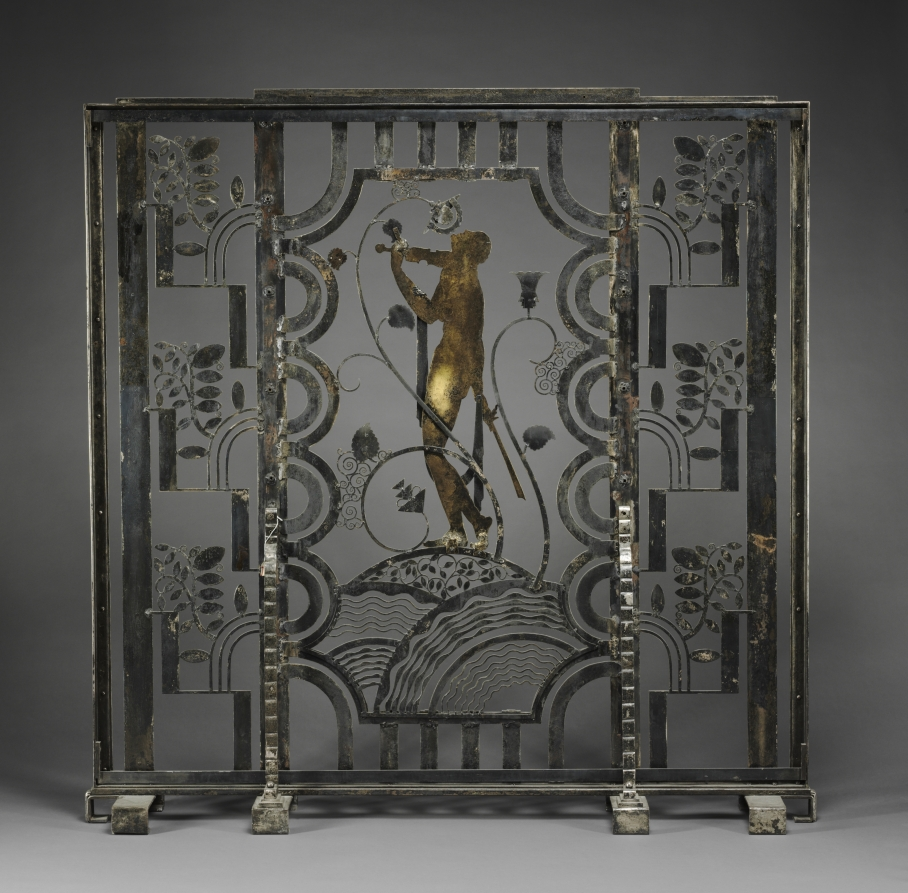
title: Muse with Violin Screen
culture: America, Ohio, Cleveland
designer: Paul Fehér (American, born Hungary, 1898–1990)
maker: Rose Iron Works (America, Ohio, Cleveland, est. 1904)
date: 1930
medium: Steel, brass; silver and gold plating, cotton velveteen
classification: Metalwork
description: Since the early years of the 20th century, the Rose Iron Works, a Cleveland supplier of architectural ornament, has produced distinguished metalwork. The company’s founder, Martin Rose, was born in Austria-Hungary and studied ornamental metalsmithing in Vienna prior to immigrating to Cleveland in 1902. In the 1920s, he hired a talented young Parisian designer, Paul Fehér, to work for the firm. Fehér’s designs, culminating in this massive screen, brought a modern European sensibility to the Rose Iron Works production. With its geometric patterning, highly stylized and abstracted natural forms, and the central figure reminiscent of the celebrated jazz singer Josephine Baker, this screen reflects the classic motifs of Art Deco design.